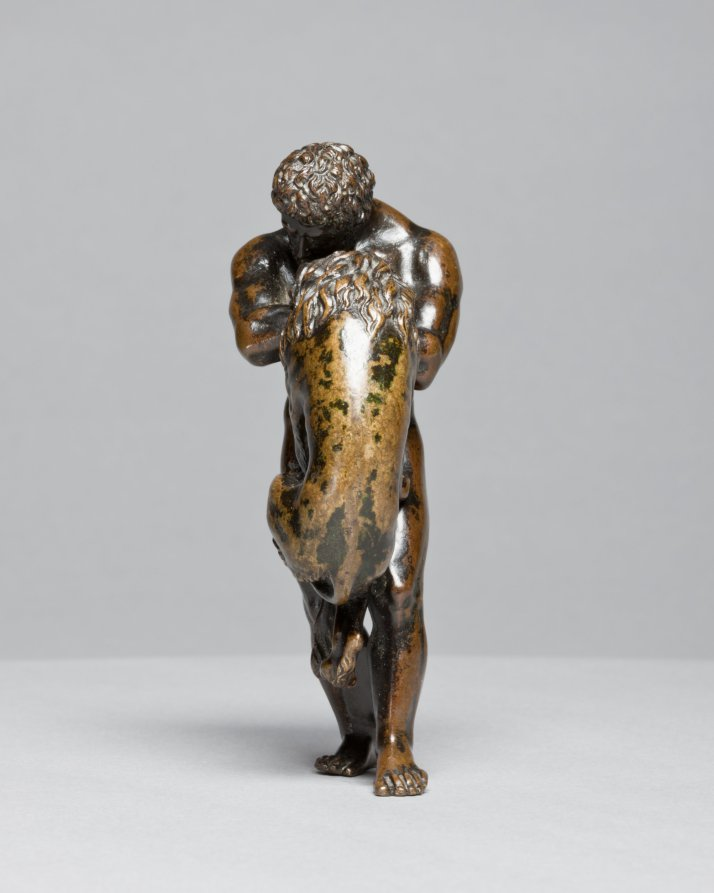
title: Hercules and the Nemean Lion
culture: Italy or France, 16th century or later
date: 1500s or later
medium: bronze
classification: Sculpture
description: The original owner of this work would have understood that this scene referred to the entire story of Hercules, the demi-god who had to accomplish twelve labors. The lion is named after the city of Nemea, near Corinth, a monstrous beast sent by the goddess Hera to wreak havoc on the area. After killing the lion, Hercules wore his pelt, commonly seen in other representations of the hero.